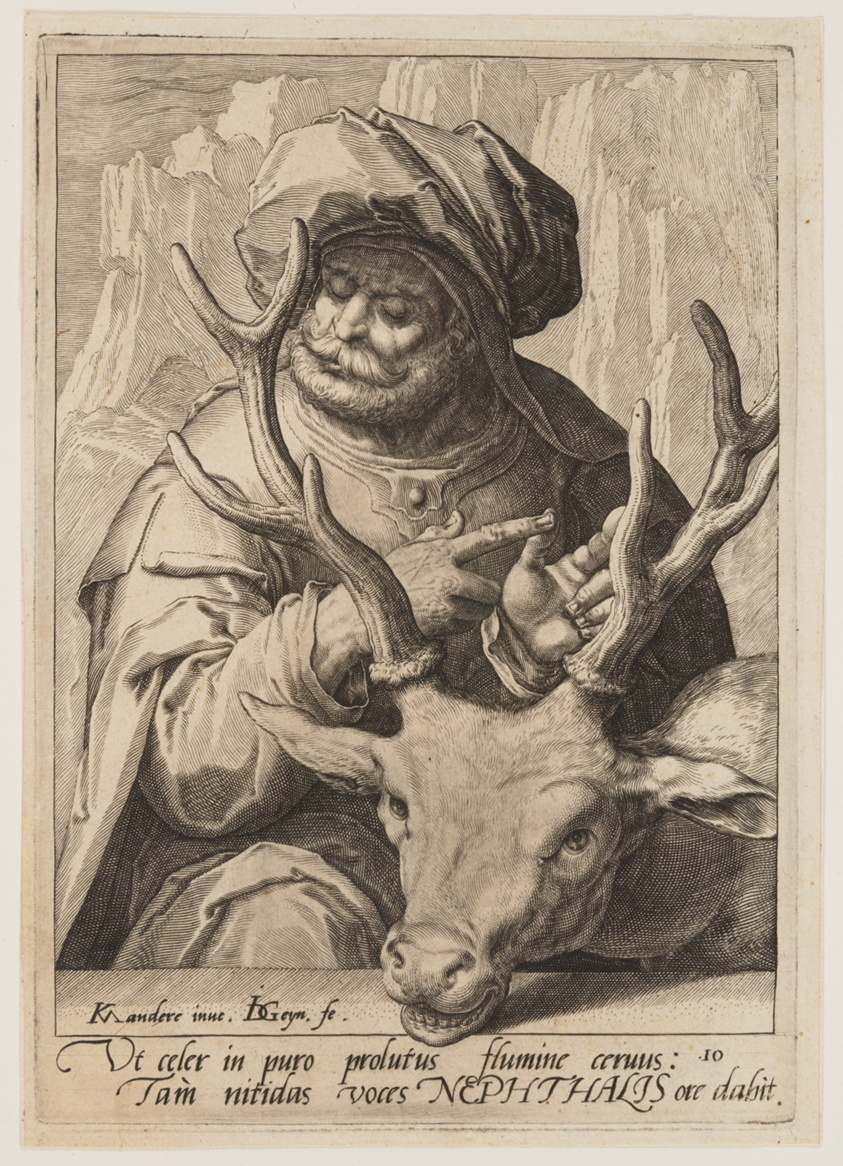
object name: Print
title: Naphthali, from The Twelve Sons of Jacob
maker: Jacques de Gheyn II (Dutch, 1565–1629); after Karel van Mander (Dutch, 1548–1606)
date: c. 1589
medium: Engraving on ivory laid paper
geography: Netherlands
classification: engraving; paper; print; prints and drawing